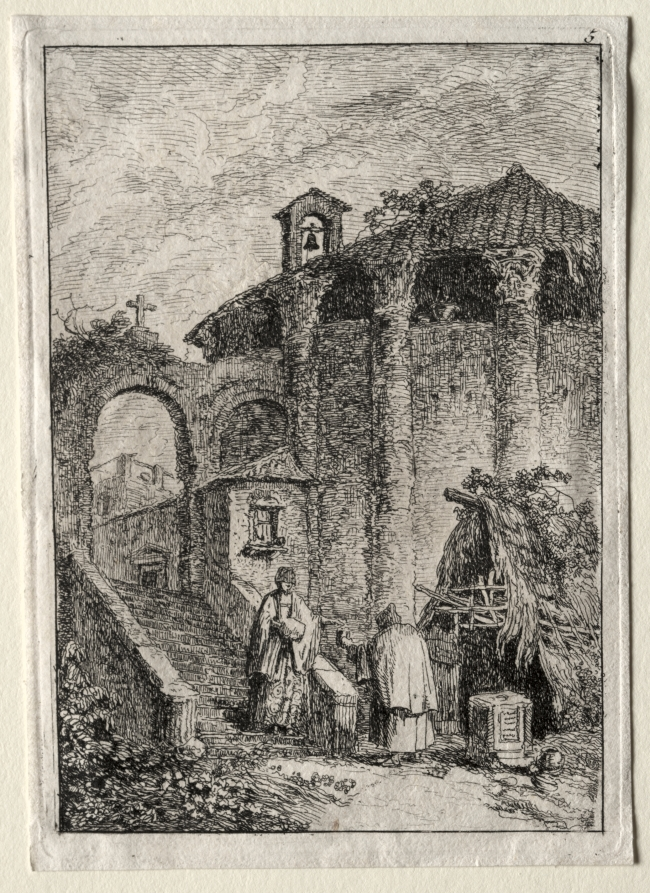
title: Le Temple Antique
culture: France, 18th century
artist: Hubert Robert (French, 1733–1808)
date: 1763–64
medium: etching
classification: Print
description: Derived from his own pen-and-ink drawings, this suite of etchings features fictional characters situated near recognizable buildings and statues in Rome. On the title page, Robert dedicated the suite to Marguerite Le Compte, who visited Rome in 1764 in the company of the wealthy author and art enthusiast Claude Henri Watelet. Both Le Compte and Watelet were amateur etchers, and they socialized with a group that included artists and printmakers centered at the academies in Italy. Robert’s dedication was likely motivated by the hope of future patronage from Le Compte. She may be the generous woman with a hand muff depicted in The Ancient Temple, the fifth scene in this series.